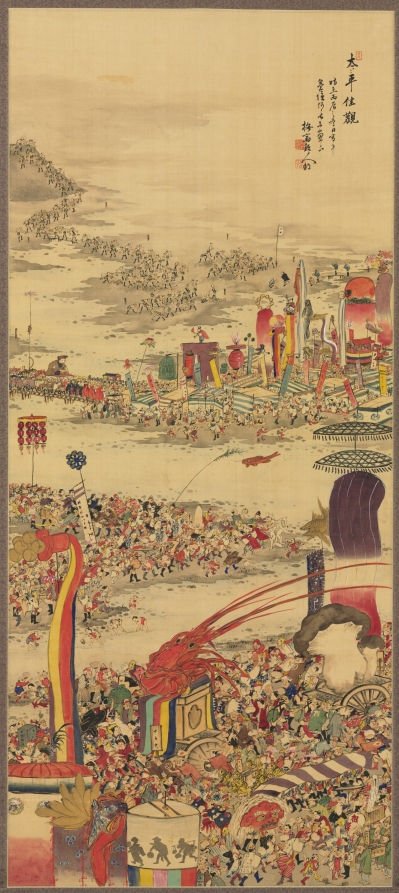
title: The Sand-Carrying Festival (Sunamochi Matsuri)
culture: Japan, Edo period (1615–1868)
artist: Sakai Basai (Japanese, dates unknown)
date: 1856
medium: hanging scroll; ink and color on silk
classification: Painting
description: Dredging waterways to preserve their function once required the cooperation of large numbers of people, seen at the top of this painting. Sand-carrying festivals were historically associated with religious rites or gathering alms to construct places of worship, and involved not only the labor of collecting sand from rivers but also parades and performances marking the event. Kyoto’s Kamo River has been dredged many times over the centuries, including in 1856, the year this image was made. Although the title at the upper right says Taihei Kakan, or “Peaceful, Beautiful View,” the painter’s delightful scene reminds his audience that at the best of times, peace may have little to do with quiet. Sakai Baisai was a student of literati painter Yamamoto Baiitsu (1783–1856). He was active until around 1879, when he relocated to Kobe to make his living as a design painter on porcelains destined for export.